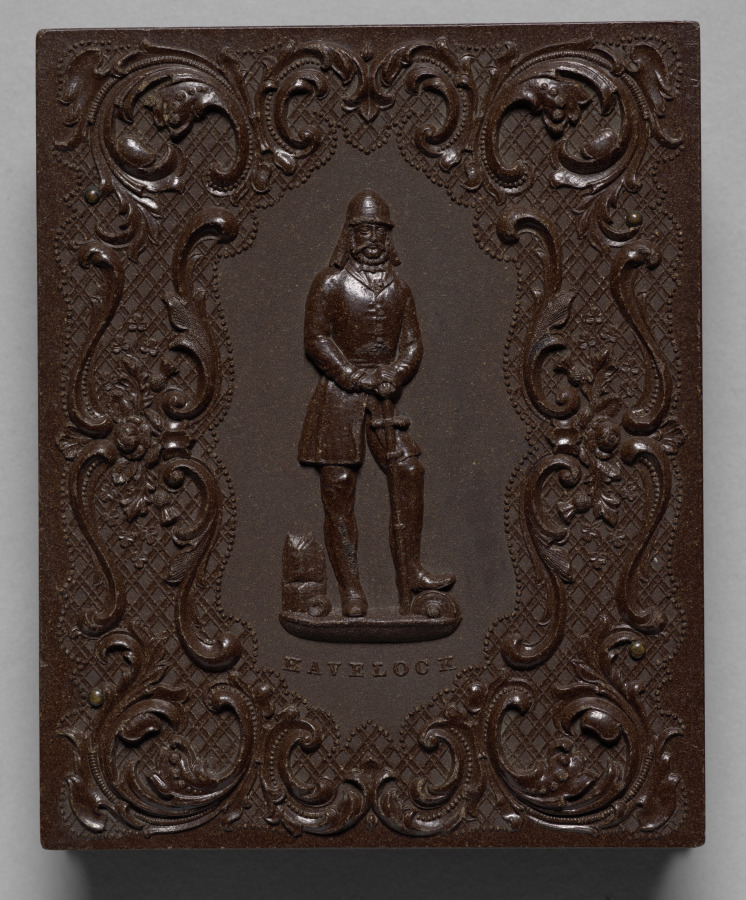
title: The Homework Table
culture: America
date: c. 1858–60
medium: daguerreotype, quarter plate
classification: Photograph